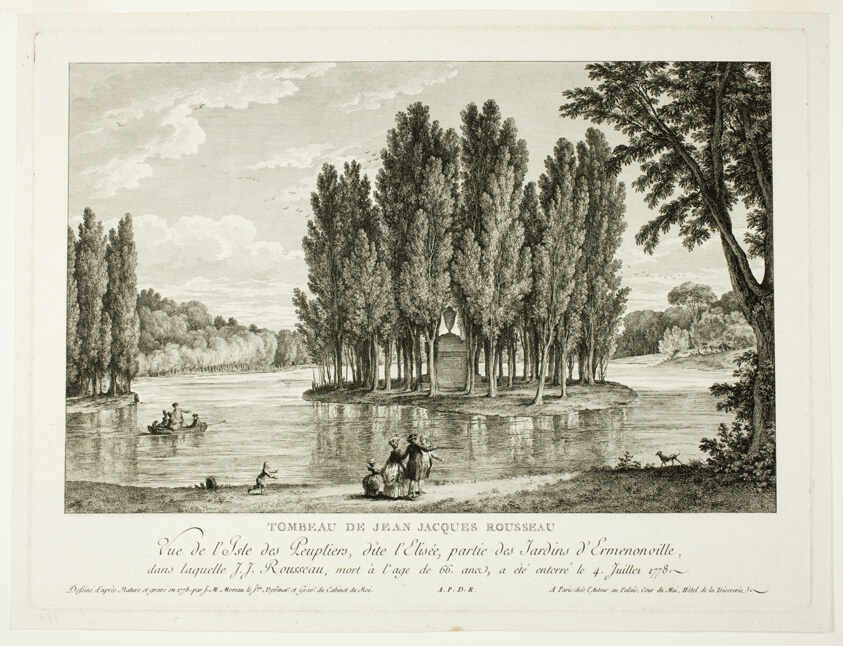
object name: Print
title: Tomb of Jean Jacques Rousseau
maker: Jean Michel Moreau (French, 1741-1814)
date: 1778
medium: Etching on paper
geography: France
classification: etching; print; prints and drawing